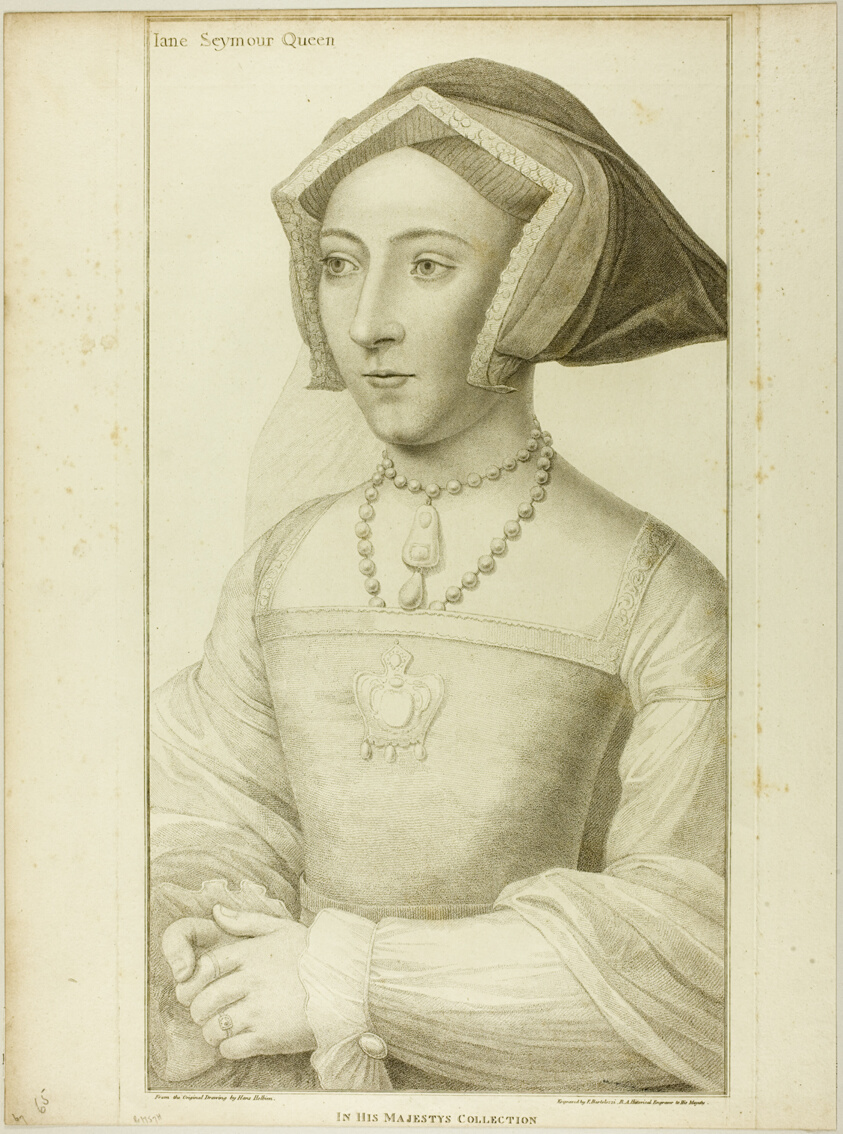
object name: Print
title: Queen Jane Seymour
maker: Francesco Bartolozzi (Italian, 1727-1815); after Hans Holbein the younger (German, 1497-1543)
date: March 26, 1795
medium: Stipple engraving on cream wove paper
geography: Italy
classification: engraving; print; prints and drawing